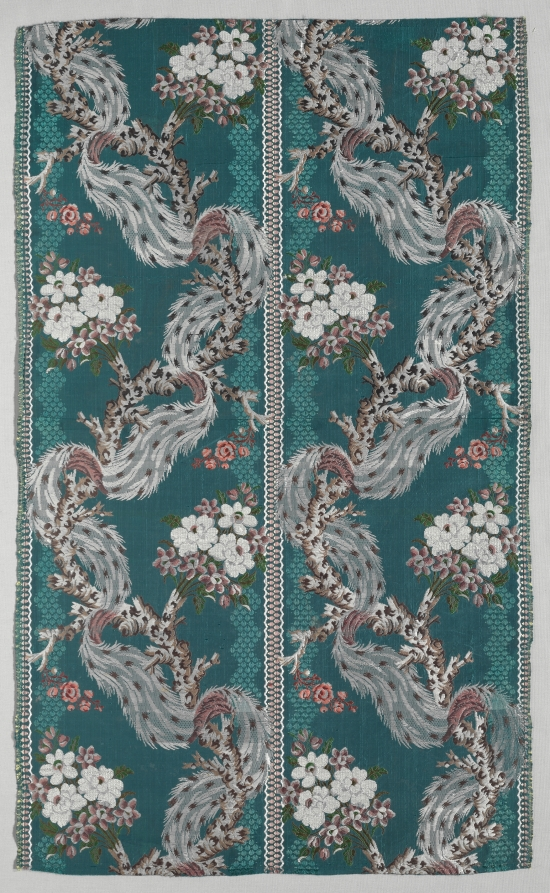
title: Length of Brocaded Silk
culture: France, 18th century, Period of Louis XV (1723-1774)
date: 1723–1774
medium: taffeta, warp-patterned and brocaded; silk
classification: Textile